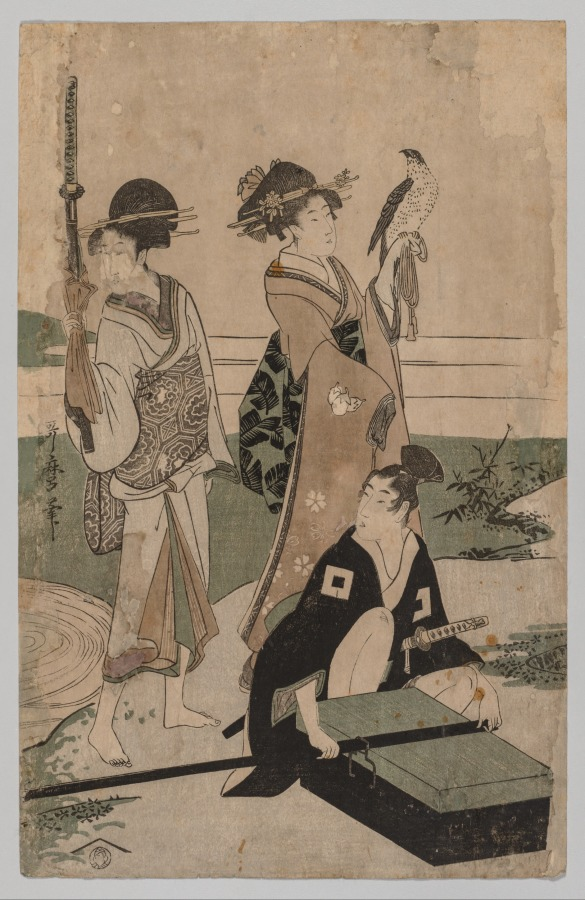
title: Daimyō and his Retinue Crossing a Stream in Plain Near Fuji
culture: Japan, Edo period (1615–1868)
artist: Kitagawa Utamaro (Japanese, c. 1754–1806)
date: 1753–1806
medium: color woodblock print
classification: Print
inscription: Signature: Utamaro fude Publisher Mark: Tsuruya Kiyeimon